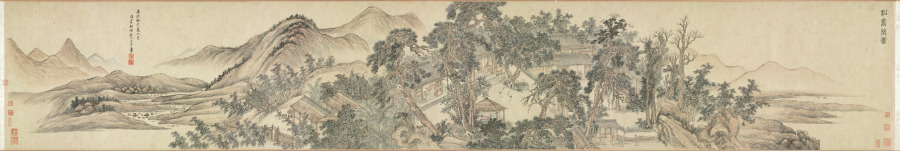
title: Hall of Lofty Pines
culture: China, Qing dynasty (1644-1911)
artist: Wang Hui (Chinese, 1632–1717)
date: 1703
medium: handscroll; ink and color on paper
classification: Painting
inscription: [題] 松喬堂圖 康熙癸未夏六月, 海虞耕煙散人王翬畫。[印]王翬之印; 石谷. [左下] 來青閣; 耕煙野老時年七十有二.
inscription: 松喬堂圖一卷，海虞石谷王君為靜海近公厲少司冦公作也。圖成于癸未之夏。未幾而公遂仙去。公令子今編修君南湖屬余題跋其後。余與公同官侍從，交契最深。側見公之清修純德，蔚為聖天子所眷重。侍直內廷，密勿贊襄，幾二十餘年。蒼生之所以受賜，士林之所以沐德者，天下莫能窺，在廷莫能悉。而公卒不言。以故宸衷日益契，恩禮亦日益渥。雖年逾懸車，時有歸老之念。而上固不聼公之去。其所謂松喬堂者，御書以賜公者也。蓋以松比公之清風勁節，而歲寒不改，經霜彌茂。則又以期公之壽考未有艾焉。公知此身未易乞，而山林槃磵之樂，止可寄諸寤思。此松喬堂圖之所由作也歟。石谷此圖，結構精密，筆墨超邁。其寫樹木之蒼蔚，堂宇之靚幽。恍見摩詰輞川樂天廬山之勝。獨惜公未得一日徜徉故園以償其願。即繪於圖亦未得以永其趣，此編修君之所以眷眷不忘也。雖然千歳之松喬，下蔭百畝，上以修棟梁之需。然則上當日名堂之意，不更望於後之人襲其芘而養其材也哉。吾願編修君之寶斯圖。并望君之塗塈丹雘，大其堂構也已矣。 康熈丙戍重陽三日，雲間王鴻緒跋。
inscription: 10 additional seals: 1 seal of Li Duna 勵杜納 (1628–1703); 4 seals of Zha Ying 查瑩 (jinshi of 1766); 5 seals of Li Yun (dates unknown).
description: Wang Hui 王翬, a leading painter in the orthodox school of the early Qing dynasty (1644–1911), was commissioned to paint this landscape with a country estate for Li Duna 勵杜納 (1628–1703), vice minister of justice in Emperor Kangxi’s court. The emperor had honored Li by granting him a piece of calligraphy with the name of Li’s retirement retreat, “Hall of Lofty Pines.” He drew a comparison between pines and Li’s upright character, resilience, and longevity. Wang Hui’s painting was supposed to allow Li to imagine living in a beautiful, secluded compound among the hills and pines. Sadly, Li died before seeing the completed painting and before receiving the emperor’s permission to retire. The landscape begins with peaceful riverbanks and low hills. The pines around the estate in the middle of the handscroll are truly lofty, some stretching even beyond the frame of the painting. Li Duna, the estate’s owner, is shown twice in his serene mountain retreat: first approaching the entrance to the compound with two servants at the right, and then later in the scroll, to the left, reading in the comfort of an inner room.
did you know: One servant carries the estate owner's carefully wrapped qin, a type of zither.